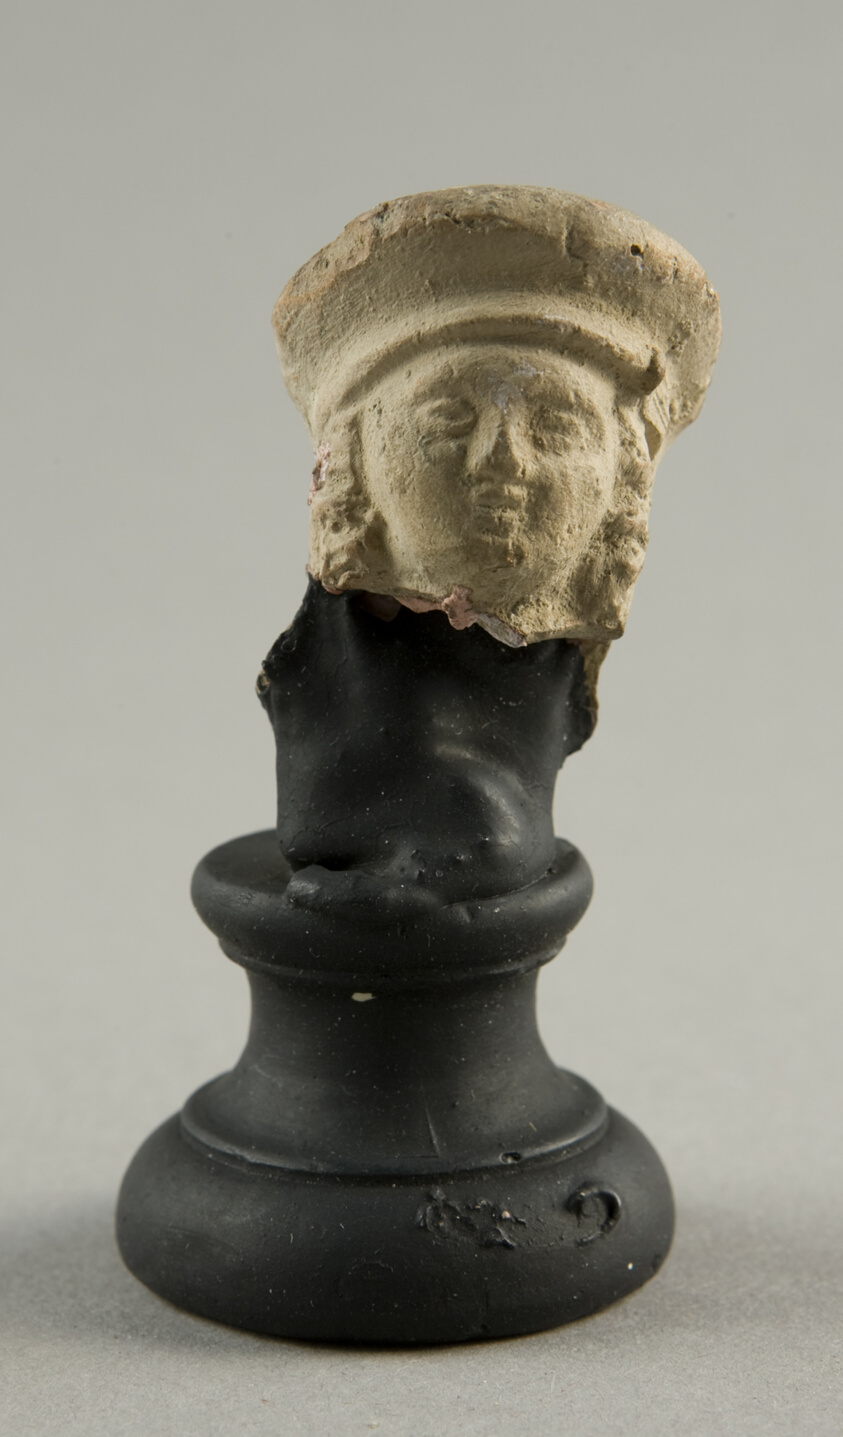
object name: Sculpture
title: Head of a Child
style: greek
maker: Greek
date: 4th-3rd century BCE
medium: terracotta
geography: Greece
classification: earthenware; ceramics; sculpture; ancient art